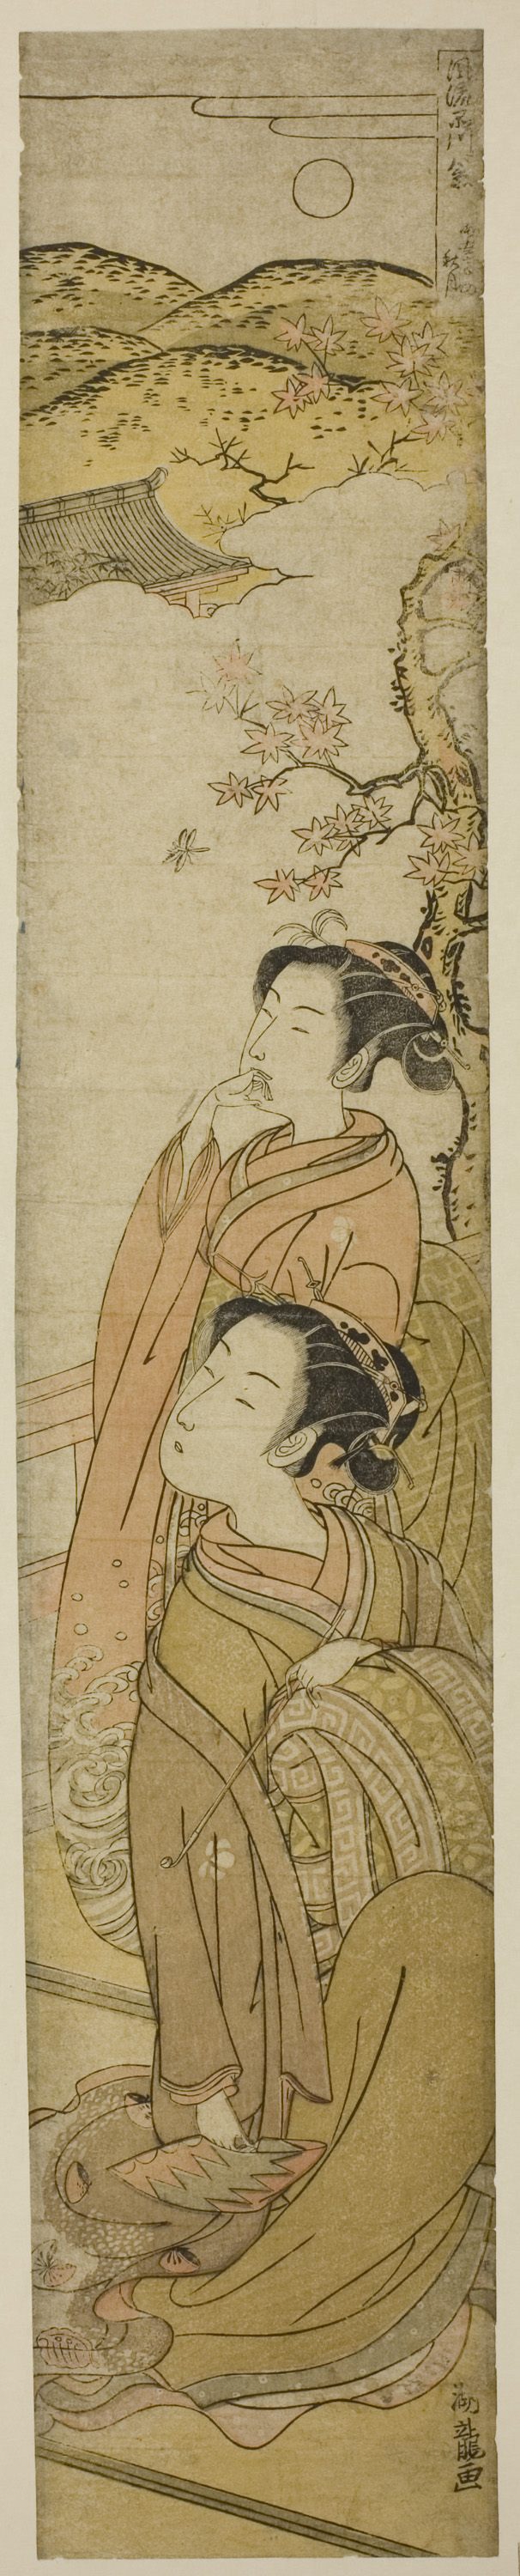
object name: Print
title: The Autumn Moon at Tokaiji (Tokaiji no shugetsu), from the series "Eight Fashionable Views of the Shinagawa (Furyu Shinagawa hakkei)"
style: Japanese (culture or style)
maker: Isoda Koryusai (Japanese, 1735-1790)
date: c. 1773/75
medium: Color woodblock print; hashira-e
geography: Japan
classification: woodblock print; print; asian art